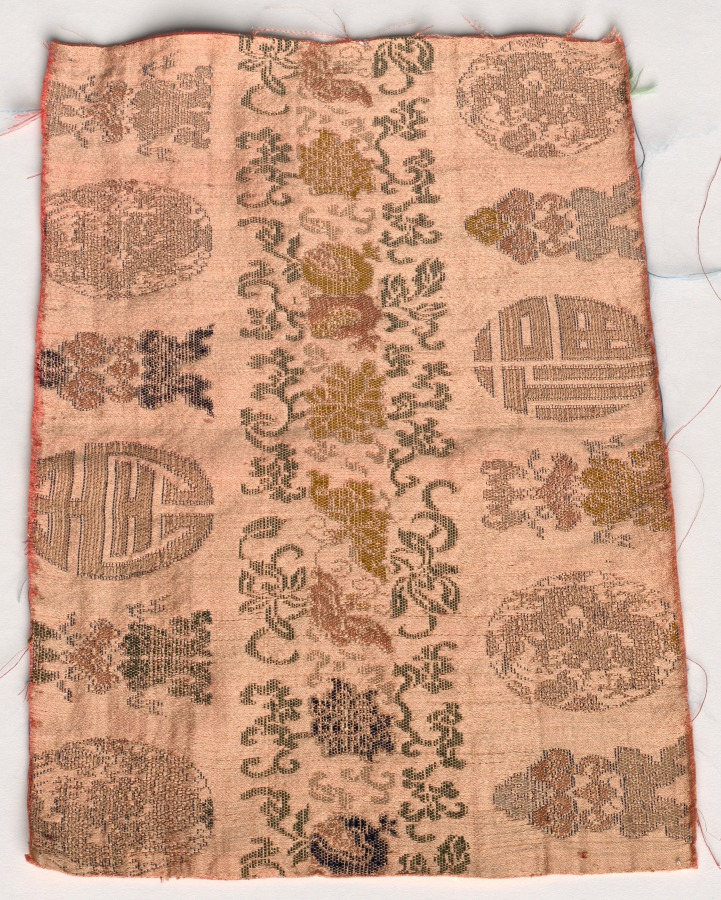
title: Fragment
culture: China, 19th century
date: 1800s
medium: silk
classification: Textile